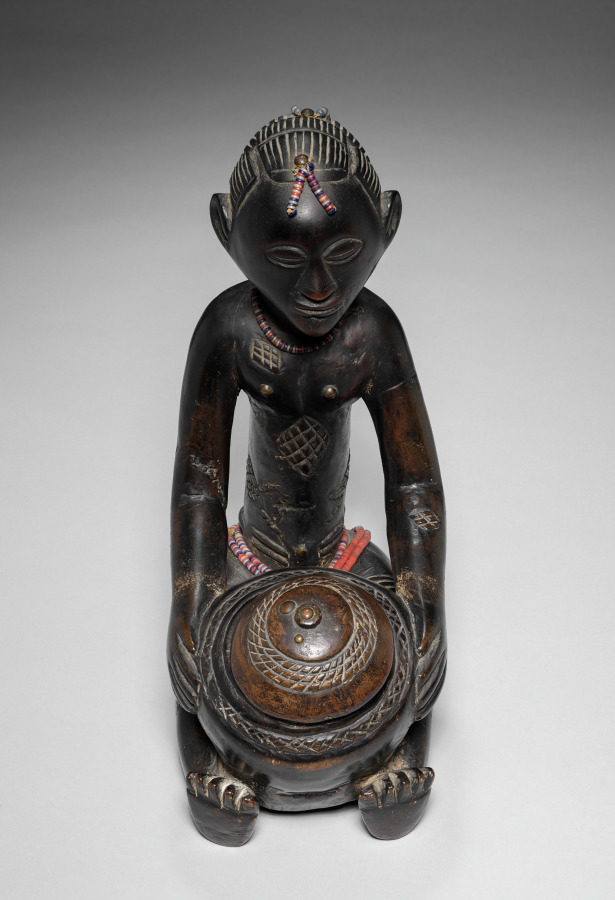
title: Female Bowl-Bearing Figure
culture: Africa, Central Africa, Democratic Republic of Congo, Luba-style carver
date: late 1800s-early 1900s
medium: Wood, glass beads, upholstery studs, plant fiber, and iron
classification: Sculpture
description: In Luba-style art, an object's beauty affects how well it works. While bowl-bearing figures had many possible uses, a royal diviner likely used this well-carved image of a woman carrying a bowl in rituals. Dusty traces of mpemba (white chalk) fleck the shining exterior and the bowl's interior, showing it once held this sacred powder. Diamond-shaped scarification marks at her waist, chest, and back add to her beauty. Her hair is carved into the cascading layered hairstyle worn in the Luba region at the turn of the twentieth century. Strands of imported glass beads encircle her waist and neck, and dangle from her hair. The alternating white and blue beads may symbolize the moon and Mbidi Kiluwe, a culture hero linked to royal practice and smithing. While much Luba-style art depicts women—who are societally important—men created and owned the majority of such works.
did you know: Symbolic of anvils, the round metal tacks decorating the figure's hair "pin" spirits and their secrets within it. They are at the hairline and each of the four hair cascades (the bottommost is now gone).